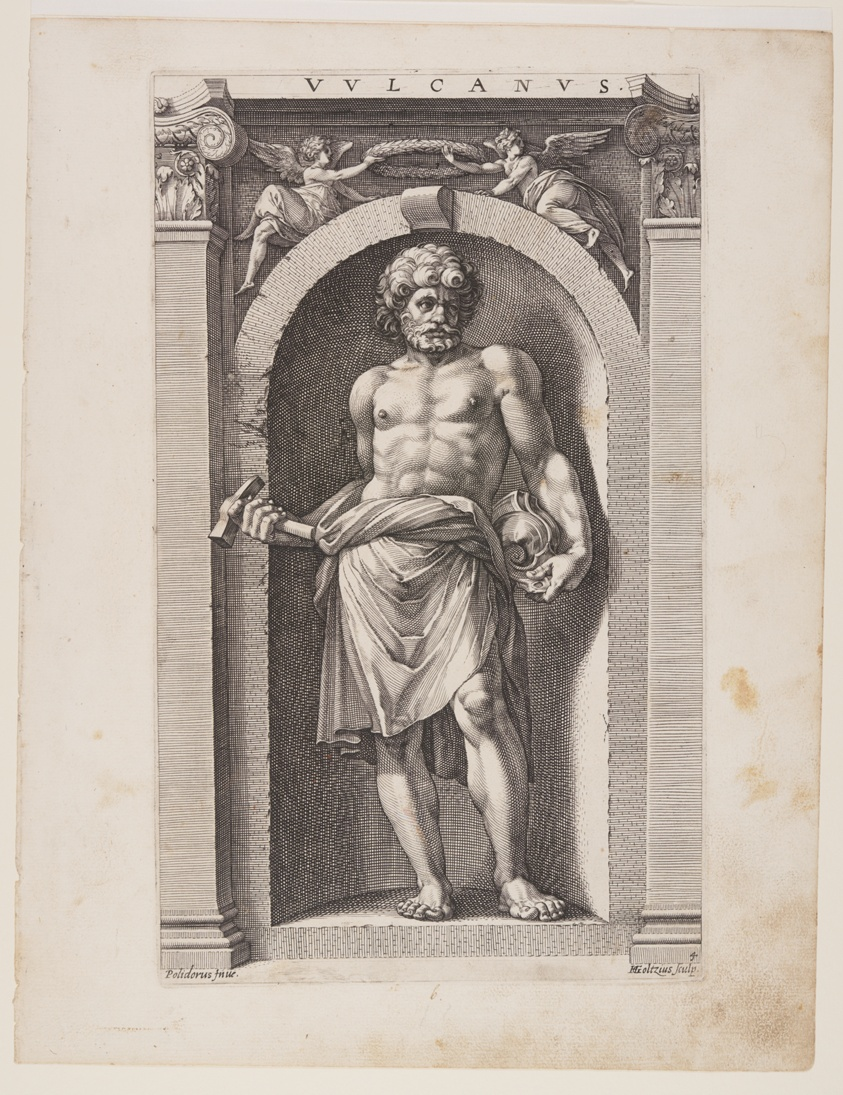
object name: Print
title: Vulcanus, from Eight Pagan Gods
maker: Hendrick Goltzius (Dutch, 1558–1617); after Polidoro da Caravaggio (Italian, c. 1499–c. 1543)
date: 1592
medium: Engraving on ivory laid paper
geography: Netherlands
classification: print; paper; prints and drawing; engraving